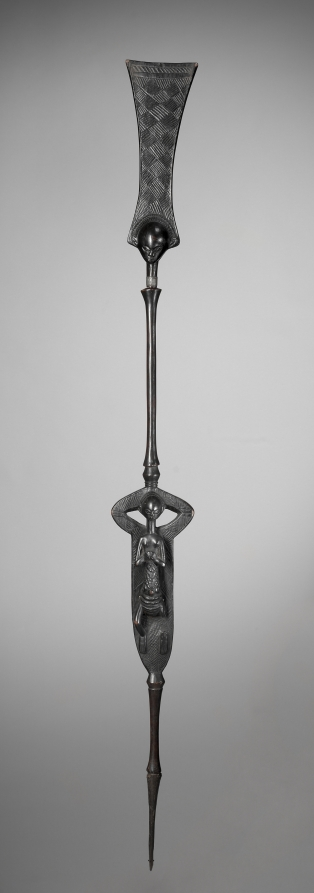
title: Staff of Office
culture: Central Africa, Democratic Republic of the Congo, Luba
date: early to mid-1800s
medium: Wood and iron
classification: Sculpture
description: Sanctified by a ritual specialist and enhanced with medicinal substances, the staff possessed supernatural qualities and was endowed with healing power. Luba staffs are among the most important regalia of Luba kings. The metal point alludes to the kingdom's stability and durability. Each staff has its own distinctive iconography to reflect regional styles. As Chief Msidi (former owner of this staff) ruled over the Yeke kingdom (and not the Luba kingdom), it begs the question of how he acquired this symbol of another realm's power.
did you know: The Yeke kingdom ruler Chief Msidi gave this as a gift of appreciation to the British missionary Frederick Stanley Arnot, whom the chief had invited to his kingdom.